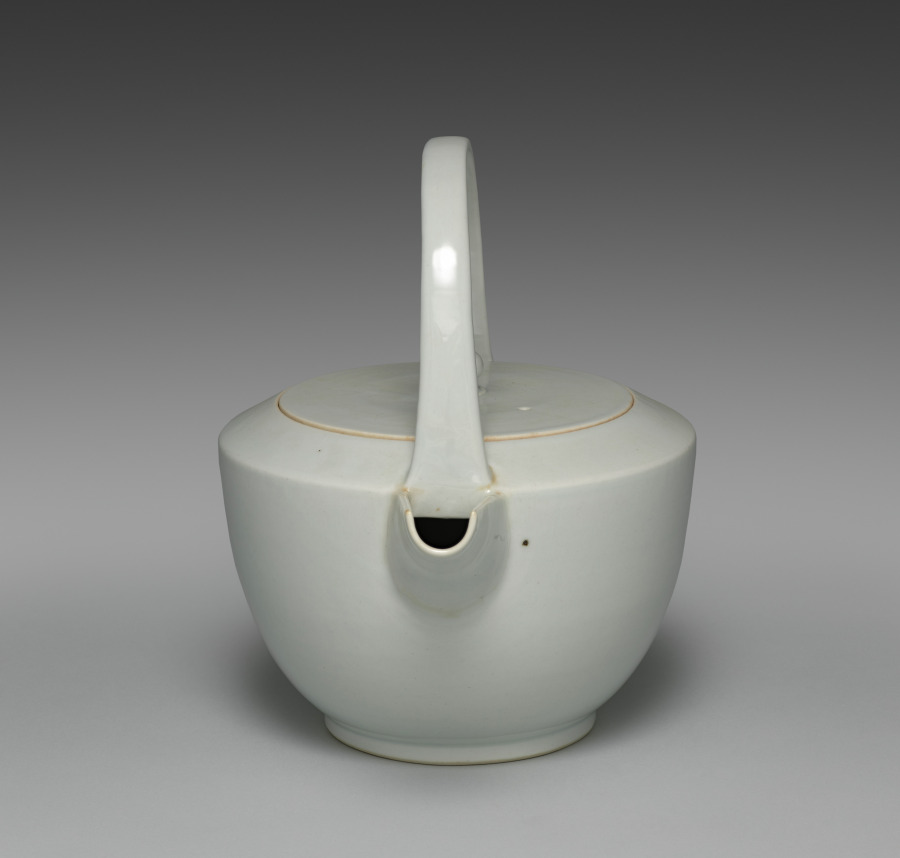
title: Sake Pourer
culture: Japan, Meiji period (1868–1912)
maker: Seifū Yohei III (Japanese, 1851–1914)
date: c. 1887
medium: Porcelain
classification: Ceramic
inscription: Artist's signature in underglaze blue on the base.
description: This sake pourer has a wide basin with a low foot; a generous spout open across the top half; a flat, round lid with a small knob recessed flush to the top of the container; and a tall, arched handle that meets the container where the top joins the basin at a sharp angle. This vessel is glazed but otherwise undecorated. Unlike the creamy white color of some Yohei III works, the white of this sake pourer has the bluish cast typical of porcelains produced in Kyoto.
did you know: Seifū Yohei III signed this sake pourer in underglaze blue on the base.